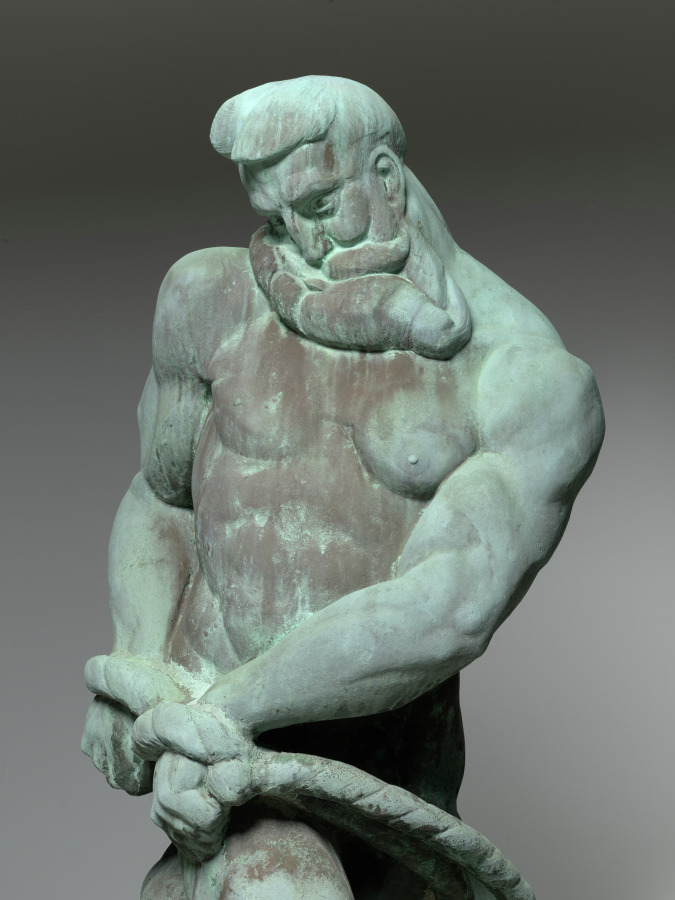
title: The City Fettering Nature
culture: America, Ohio, Cleveland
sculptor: Alexander Blazys (American, born Russian Empire [now Lithuania], 1894–1963)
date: 1927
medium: bronze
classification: Sculpture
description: Alexander Blazys, a Lithuanian immigrant, became a leading sculptor in Cleveland during the 1920s, when he created The City Fettering Nature for the Cleveland Museum of Art’s grounds. In this composition, Utility and Beauty, two characteristics of the city, are shown as intertwined figures attempting to subdue Nature’s power. The brawny figure of Nature, still standing despite this attack, struggles to free himself from the restraints.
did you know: This monumental bronze sculpture weighs 1,500 pounds and requires a crane to install.